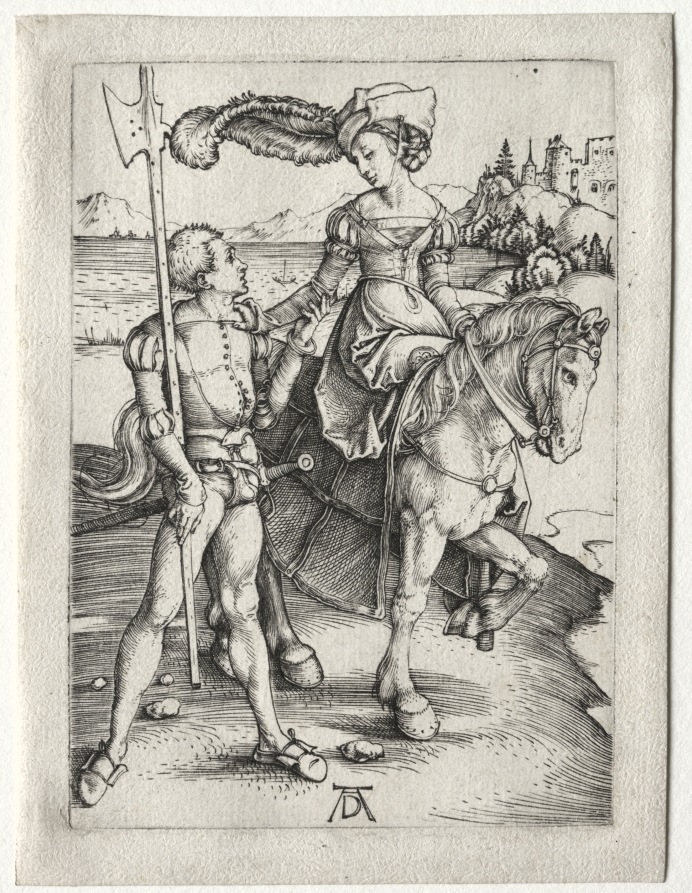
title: The Lady Riding and the Landsknecht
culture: Germany, late 15th-early 16th Century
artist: Albrecht Dürer (German, 1471–1528)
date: c. 1497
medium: engraving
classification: Print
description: At first the subject of this early print appears to be simple courtly love; in it a noblewoman and infantryman share a private moment of farewell. However, a deeper reading of the image suggests underlying themes related to the power of women. Although the young man’s stance and weaponry establish his masculinity, the woman’s higher social status and physical position on horseback allude to her authority over him. Further, the hat she wears belongs to her lover’s costume, not to contemporary women’s fashion. Her appropriation of his clothing combined with his delicate touch and forlorn gaze creates an instance of role reversal, indicating that she holds the power in this romantic situation.